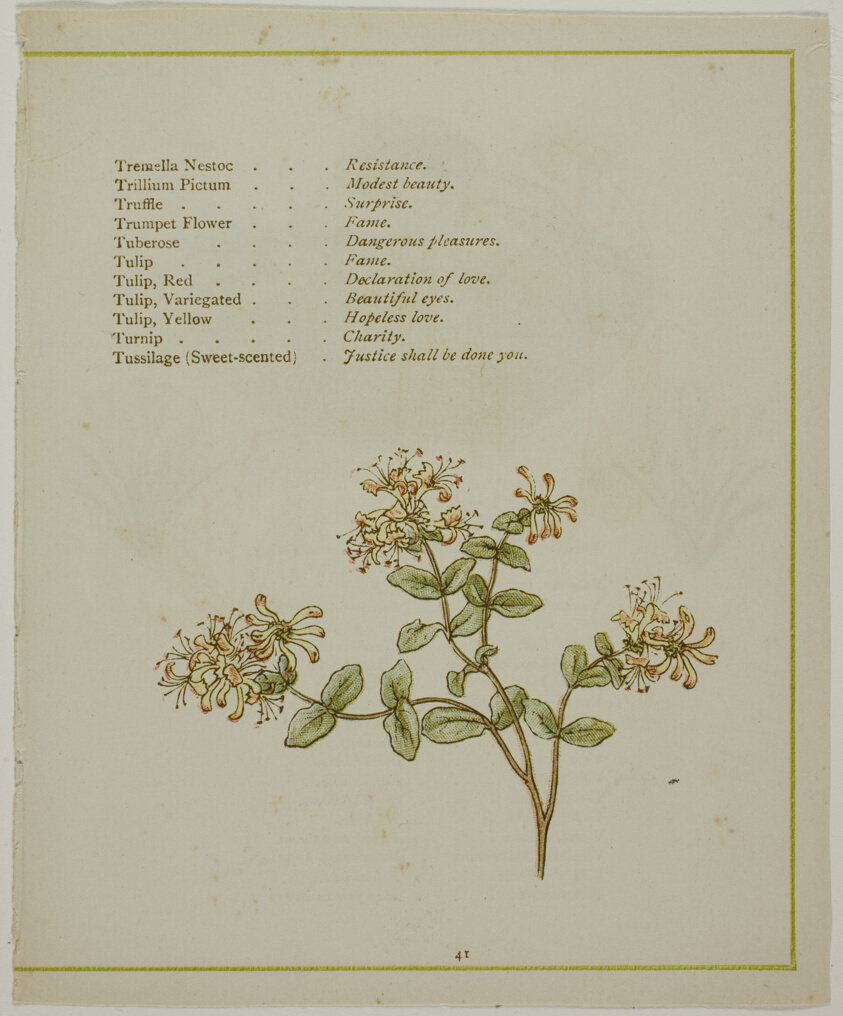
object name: Print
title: Valerian Through Volkamenia, from The Illuminated Language of Flowers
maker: probably Edmund Evans (English, 1826-1905); after Kate Greenaway (English, 1846-1901); printed by Edmund Evans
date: published 1884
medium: Color wood engraving (chromoxylograph) reproduction of a watercolor on paper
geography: England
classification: reproduction; print; prints and drawing